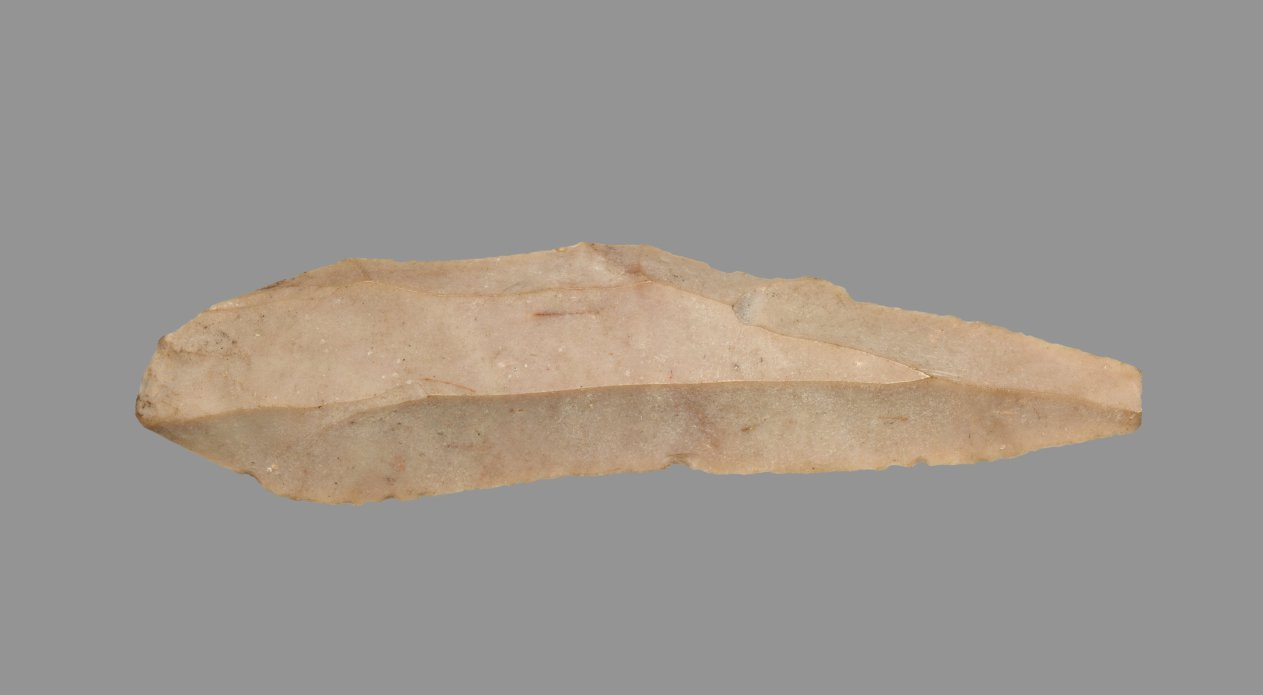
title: Sickle Blade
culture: Egypt, Middle Kingdom (2040–1648 BCE), Dynasty 12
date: 1980–1801 BCE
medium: flint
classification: Implements